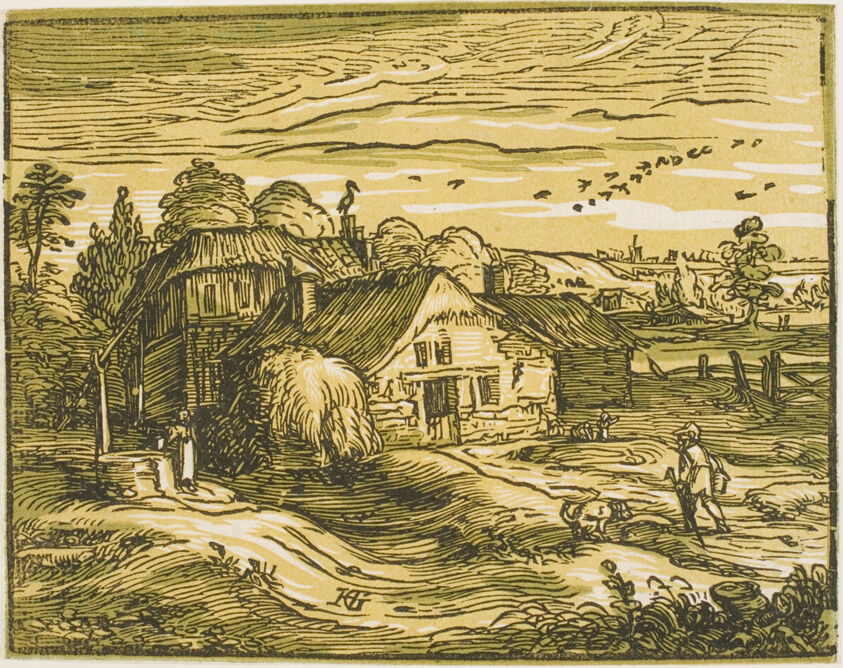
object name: Print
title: Landscape with a Farmhouse, from Four Small Landscapes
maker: Hendrick Goltzius (Dutch, 1558-1617); printed by Willem Jansz. Blaeu, Amsterdam (Dutch, 1605/20)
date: 1597/1600, printed 1605/20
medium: Chiaroscuro woodcut in black, ochre, and green, on ivory laid paper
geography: Netherlands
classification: woodcut; print; prints and drawing